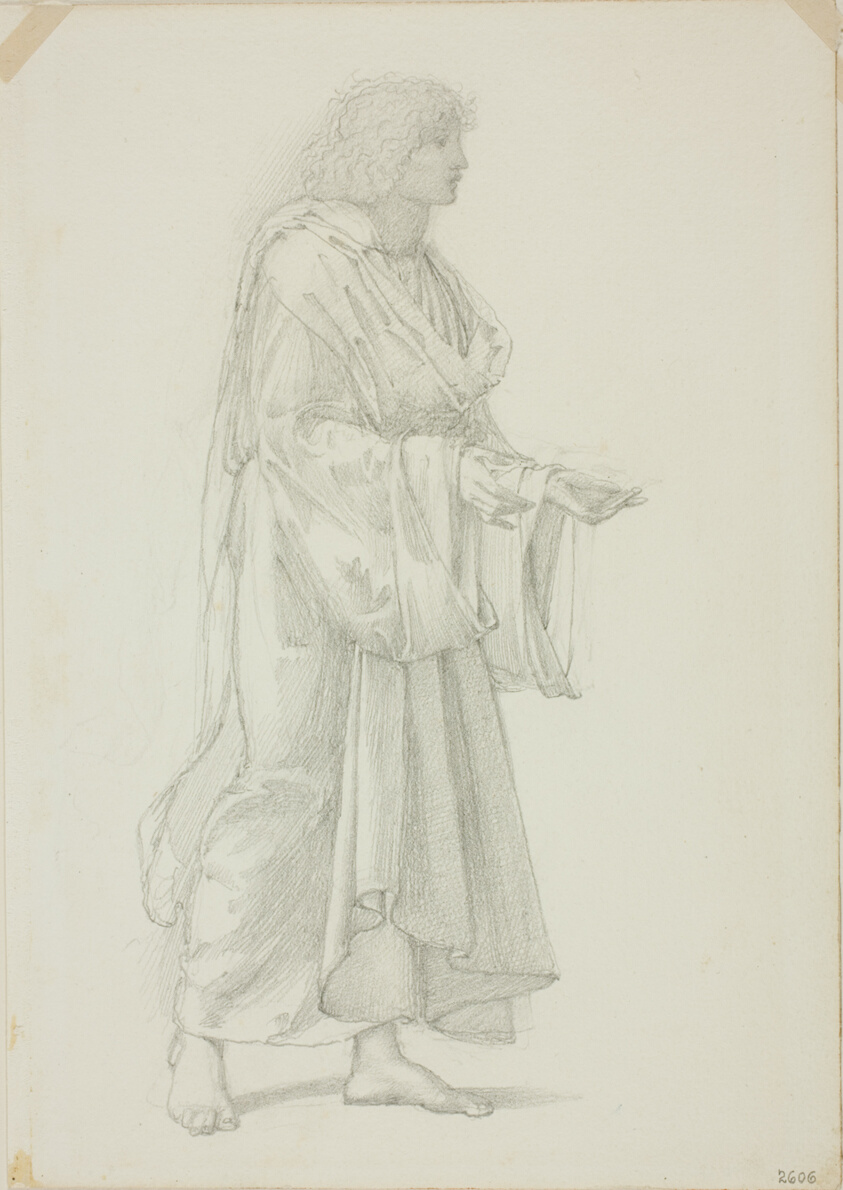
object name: Drawing and Watercolor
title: Draped Standing Male Figure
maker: Sir Edward Burne-Jones (English, 1833-1898)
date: c. 1873–77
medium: Graphite on ivory wove paper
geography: England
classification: graphite; drawings (visual works); prints and drawing